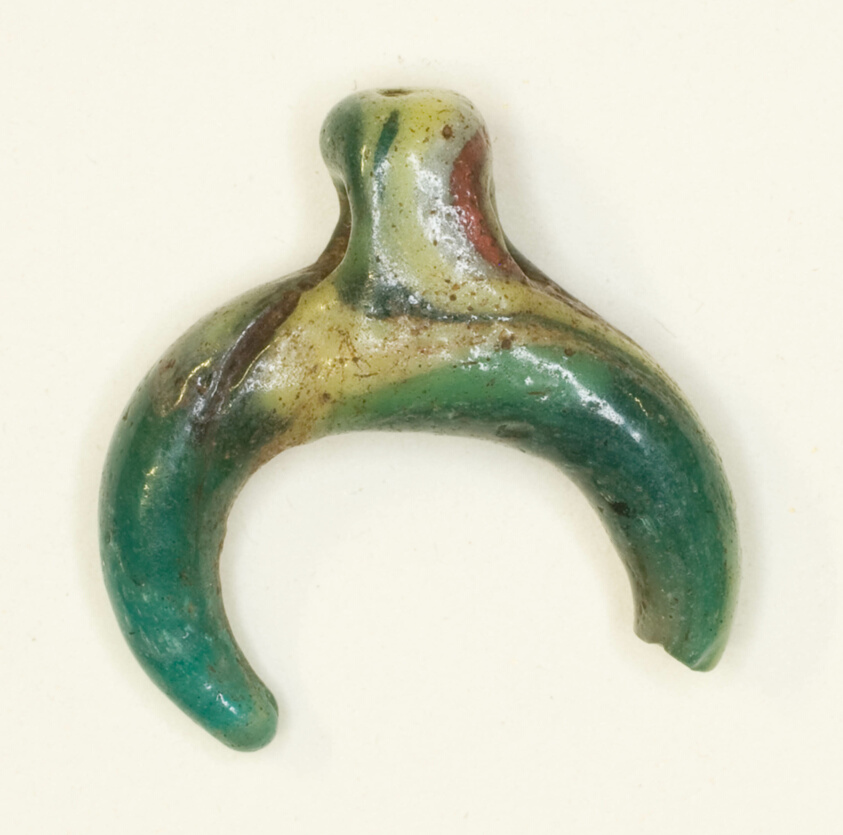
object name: Costume and Accessories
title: Amulet of the Lunar Crescent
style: egyptian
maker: Egyptian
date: New Kingdom–Roman Period (about 16th century BCE–4th century CE)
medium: Glass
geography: Egypt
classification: amulet; jewelry; glass; ancient art; costume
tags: moon